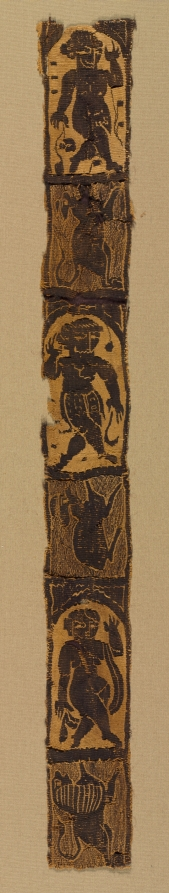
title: Ornamental Shoulder Bands from a Tunic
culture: Egypt, Byzantine period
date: 500s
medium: Undyed linen and dyed wool: tapestry weave with supplementary weft wrapping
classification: Textile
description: The orientation of the figures indicates that these were vertical bands on a tunic descending from the shoulders. Human figures under arches alternate with dogs, rabbits, and a lion. The right band displays a nude female dancer playing finger cymbals at the top and bottom, and in the center, a hunter dressed in a short garment (chiton) draped over one shoulder carries a shield in his right hand and a rock in his raised hand. The left band displays, from top to bottom, a nude male carrying a leafy branch; a shepherd carrying a shepherd’s crook and dressed in a skirt of animal skin; and a nude female dancer with a scarf loosely draped behind her.